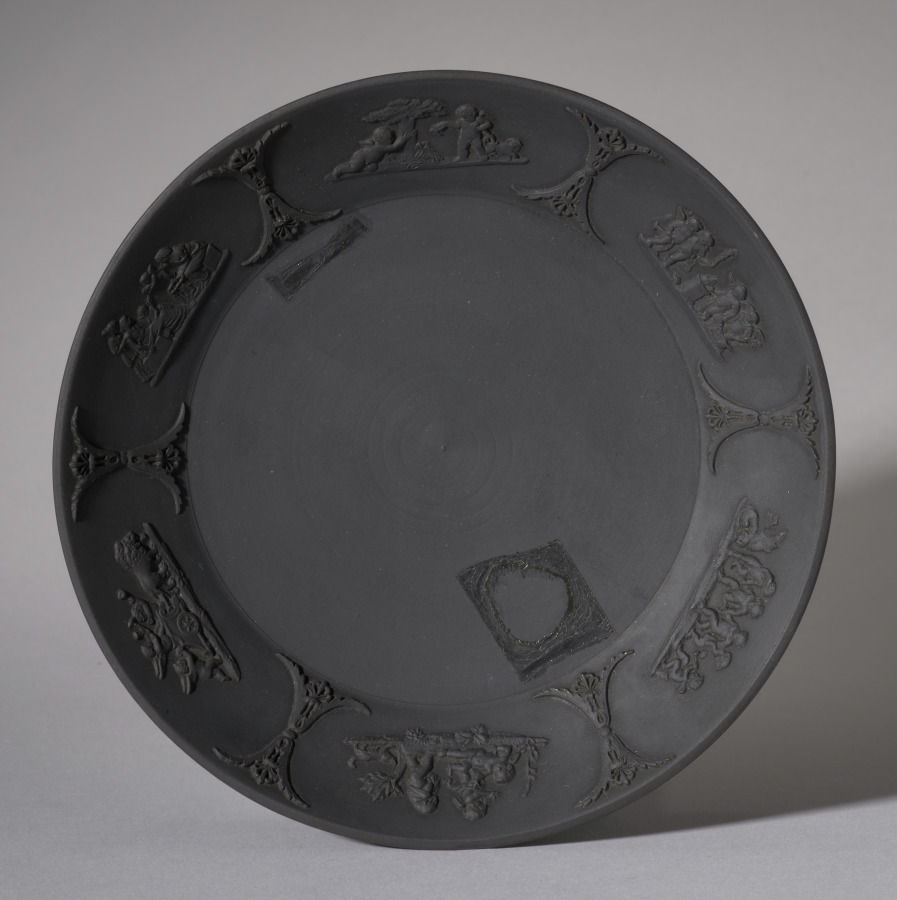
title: Saucer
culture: England, Staffordshire, 19th century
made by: Wedgwood Factory (British)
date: 1800s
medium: black basalt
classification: Ceramic